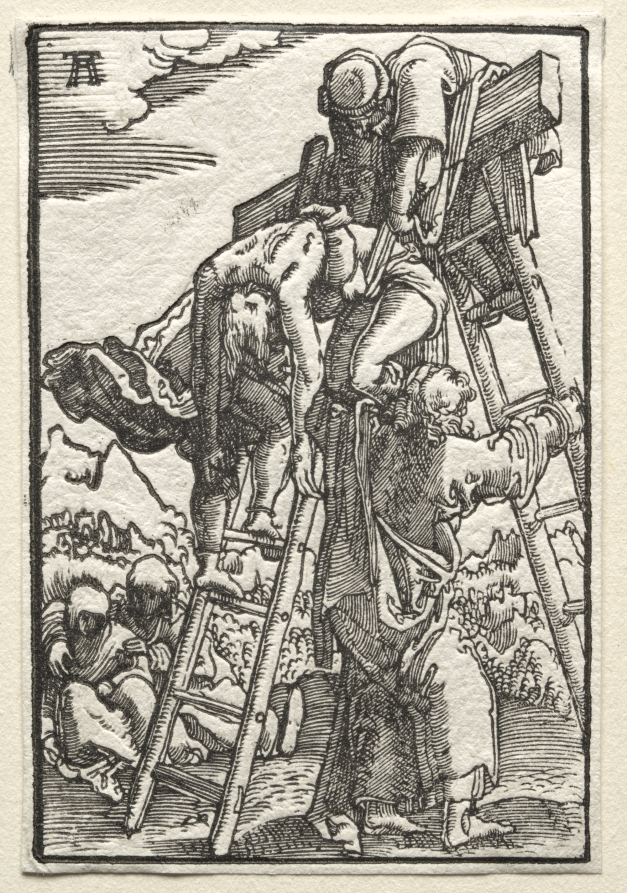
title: The Fall and Redemption of Man: Descent from the Cross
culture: Germany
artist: Albrecht Altdorfer (German, c. 1480–1538)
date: c. 1515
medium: woodcut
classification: Print